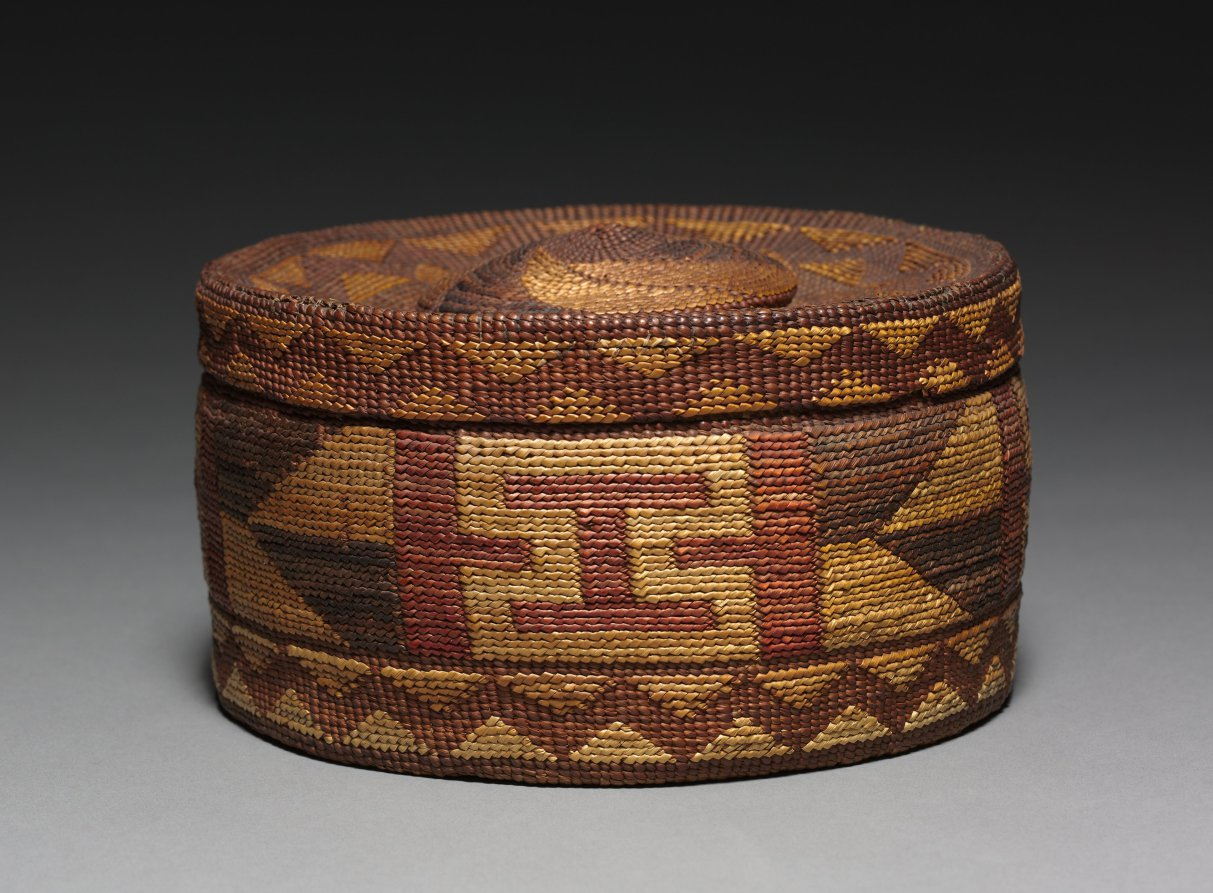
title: Basket with Rattle Top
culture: Northwest Coast, Tlingit, 20th century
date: before 1929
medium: twined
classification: Basketry